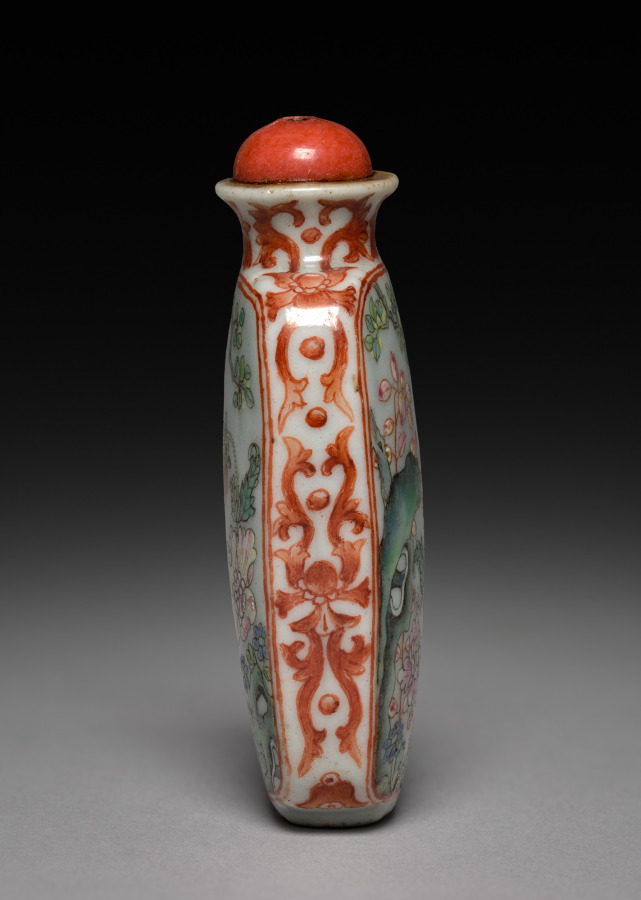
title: Snuff Bottle with Stopper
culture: China, Qing dynasty (1644–1911), Qianlong reign (1736–95)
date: 1736–95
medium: porcelain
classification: Ceramic